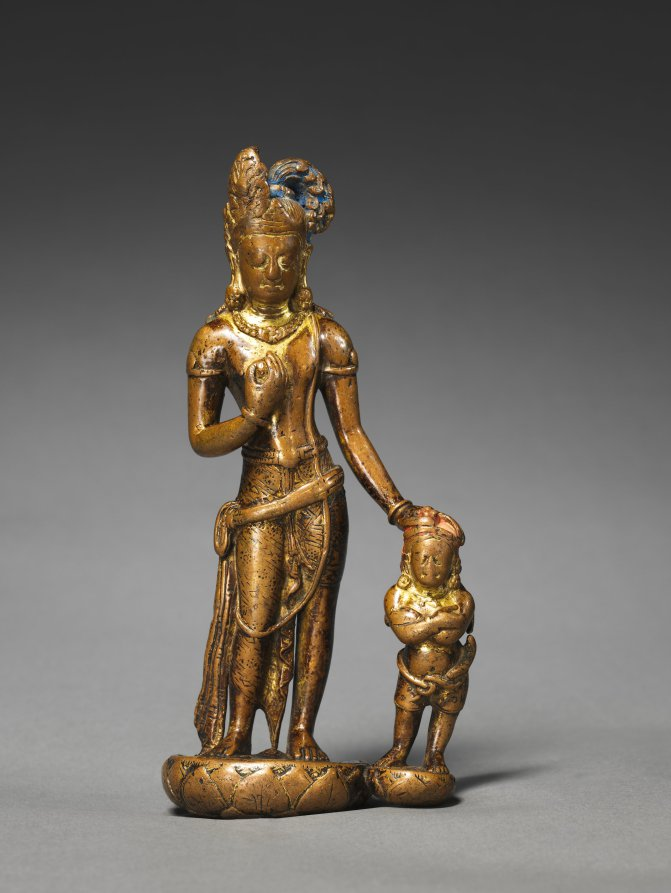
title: Bodhisattva Vajrapani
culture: Nepal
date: 700s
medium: copper with traces of gilt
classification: Sculpture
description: One of the earliest surviving tantric sculptures, this figure of Vajrapani—"he who holds the lightning bolt"—places his hand on a vajra, a thunder bolt symbol that refers to the lightning speed with which practitioners may achieve enlightenment when they follow tantric techniques. The prongs of the lightning bolt are in his hair; his arms are crossed, and a knotted snake is slung around his hips. Vajrapani's elaborate hairstyle, along with the gentle articulation of the cloth, subtly swaying postures, and introspective expressions are close derivations from 5th-century models, thereby implying an early date for the bronze.